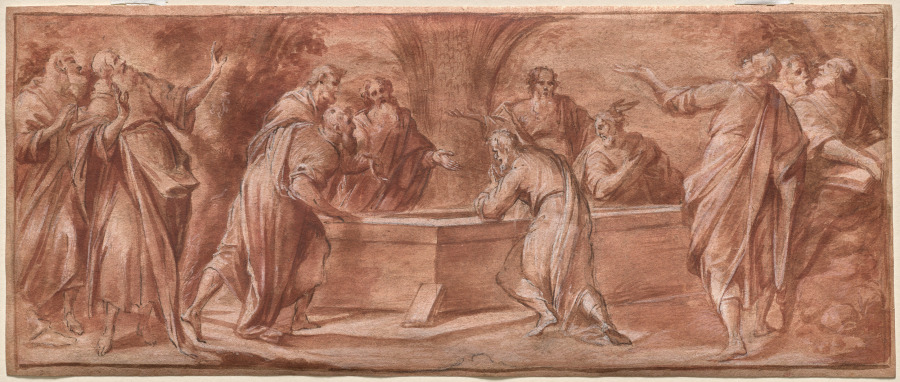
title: The Apostles Gathered Around the Tomb of the Virgin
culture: Italy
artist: Camillo Procaccini (Italian, 1546–1629)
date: c. 1594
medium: Pen and ink and brush and wash with white heightening on paper prepared with reddish-brown wash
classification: Drawing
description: Camillo Procaccini was a significant figure in the artistic activity of Bologna and Milan at the beginning of the Catholic Counter Reformation. This drawing is a preparatory work related to large oil painting still in situ (in its originally intended location), in the apse of the Santa Maria Maggiore in Bergamo, Italy. Part of a program depicting the assumption of the Virgin, the drawing shows the apostles at the empty tomb of the Virgin, exclaiming with emotion at the miracle of her ascension to heaven. Procaccini’s iconographic program aligned with current reforms in Catholic imagery that placed emphasis on articles of faith and lives of the saints, often through miracles.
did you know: The warm, reddish color of this paper was created with a colored ink wash in order to create a middle tone upon which the artist could draw with lighter and darker tones, creating a study of dark and light, or chiaroscuro.